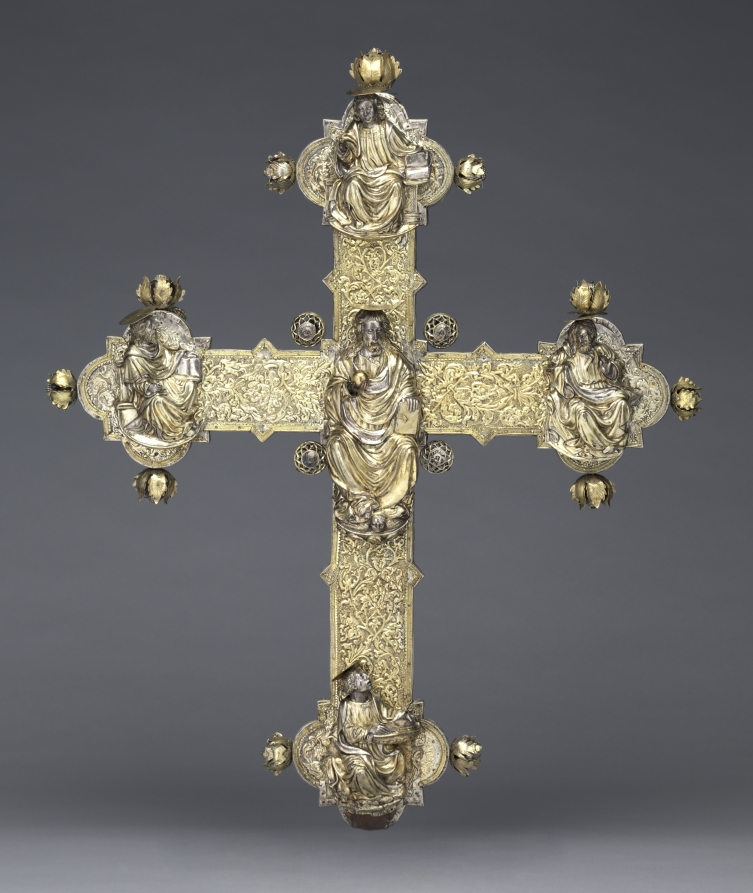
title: Processional Cross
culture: Italy, The Marches, 15th century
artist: Pietro Vannini (Italian, 1413/14–1495/96)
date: c. 1440–50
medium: silver, gilt-silver, and repoussé, over wood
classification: Metalwork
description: This remarkable object, meant to be carried in religious processions within a great church, is an example of the high level of skill achieved by 15th-century Italian silversmiths. The cross was made from hammered, chased, and gilded sheets of silver attached to a wooden core. The figures are made in repoussé, a technique of hammering the silver from beneath to create a design. On the front of the cross is the figure of Christ flanked by the seated Virgin and Saint John, with God the Father blessing from above. The back of the cross includes the figure of Christ in Majesty at the center, with the Evangelists at the end of each arm.